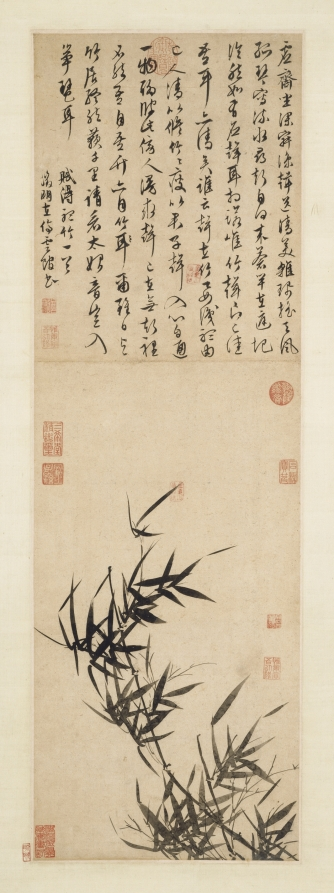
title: Listening to the Bamboo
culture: China, Ming dynasty (1368–1644)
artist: imitator of Wen Zhengming (Chinese, 1470–1559)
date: late 1400s-1500s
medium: hanging scroll, ink on sutra paper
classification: Painting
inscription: Artist's inscription, signature, and 2 seals on the separate sheet of paper above the painting: In the empty studio sitting in deep loneliness;/ Like cool sound sending pure beauty,/ Or pendants swinging in the wind,/ Or a solitary qin suggesting running water./ Where is that sound from?/ The green poles in the courtyard,/ Clear and light like an echo,/ The sound and ears are in tune./ The sound of bamboo now very beautiful;/ My ears are also clear./ Who says the sound is in the bamboo?/ To know it depends on oneself./ A noble person is like a tall bamboo;/ A thin bamboo is like the noble man./ When the sound enters, the mind responds,/ Only one thing but artificially separated./ A bystander searching for the sound,/ But the sound can only be found in silence./ Otherwise I am still I,/ Bamboo is still bamboo./ Even if I live with bamboo every day,/ Still the music will be a thousand miles away./ Look at sound's most primeval source:/ Did it enter a zither or a lute? Composing a poem on Listening to the Bamboo. Written by Zhengming at the Ting yun guan. Wen Zhengming [2 seals] Wen Zhengming yin 文徵明印; Wei geng yin wu yi jiang 惟庚寅吾以降.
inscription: [印] 文徵明印; 惟庚寅吾以降.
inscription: 5 seals of the Qianlong emperor (r. 1736-95)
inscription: [印] 金粟山藏經紙